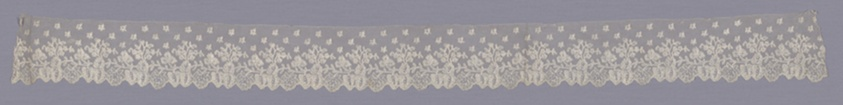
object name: Textile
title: Border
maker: Belgium, Flanders, Mechlin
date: c. 1820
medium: Cotton and linen, bobbin straight lace of a type known as "Mechlin" with a Mechlin mesh ground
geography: Flanders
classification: textile; lace - bobbin; lace